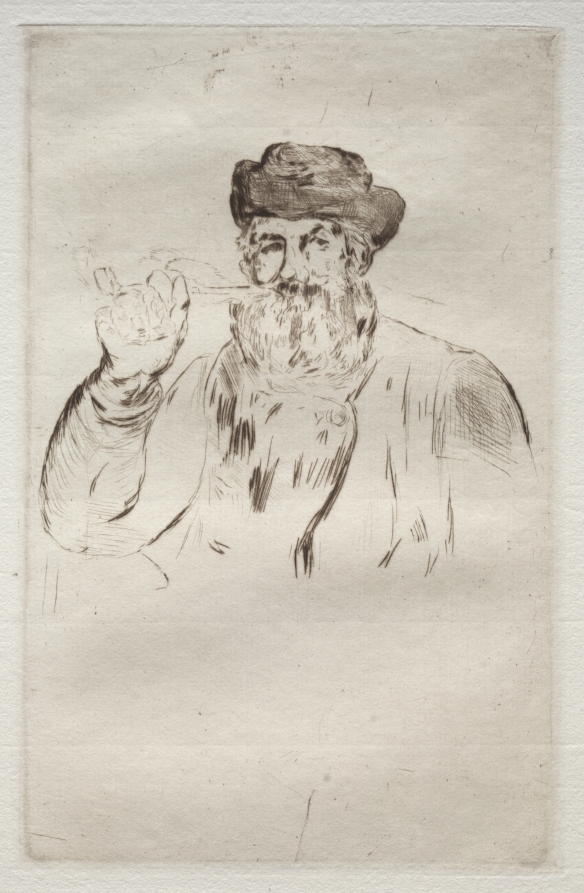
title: Le fumeur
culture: France, 19th century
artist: Édouard Manet (French, 1832–1883)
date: 1866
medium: drypoint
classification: Print